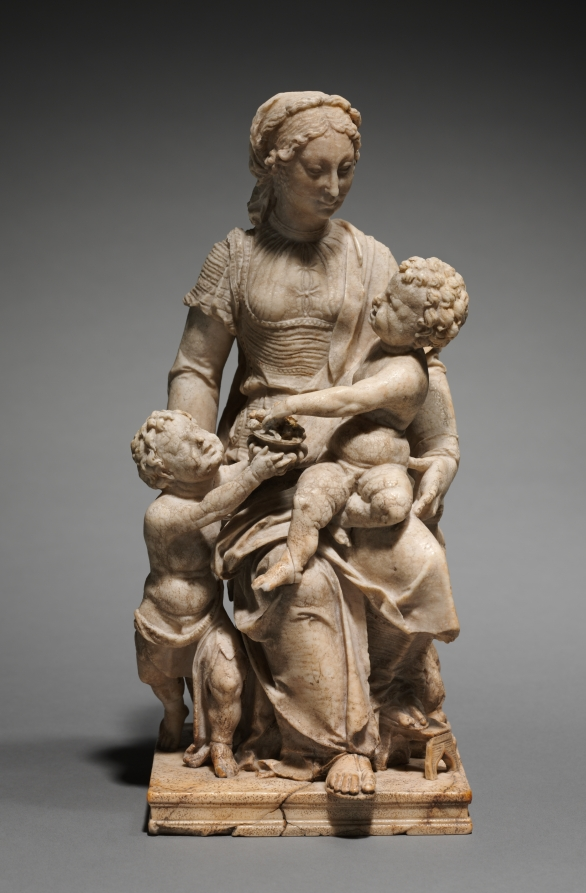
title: Charity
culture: Franco-Flemish, second half 16th century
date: c. 1550–1600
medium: alabaster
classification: Sculpture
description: When this alabaster group entered the museum's collection, it was thought to depict the Virgin Mary, Christ, and Saint John the Baptist. It has been identified, however, as a personification of Charity, the most elevated of the three Christian theological virtues. The two other theological virtues are Faith and Hope. Within Christian belief, Charity is also known as a supernatural virtue, where the object of human conduct is the ultimate unification with God through love. Alluding to its eminent position, Charity sits enthroned, with powerful hybrid beasts supporting her chair. The diminutive footstool propping up her left foot may refer to the necessity of humility in one's relationship to God. Also, a child raises a vessel filled with fruits to another suggesting that selflessness and love are attributes of charitable actions.